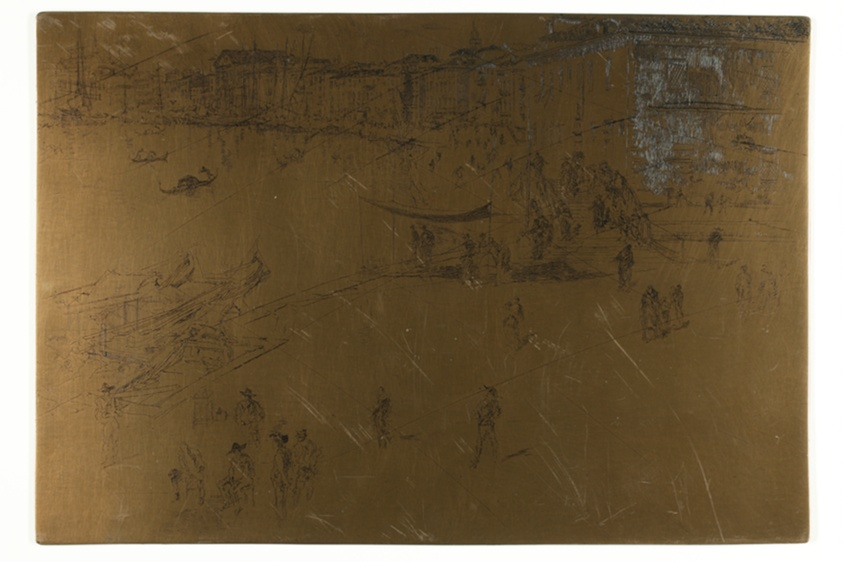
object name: Print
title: Riva, No. 2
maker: James McNeill Whistler (American, 1834-1903)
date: 1879/80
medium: Cancelled copper plate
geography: United States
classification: copper plate; prints and drawing; matrix; print